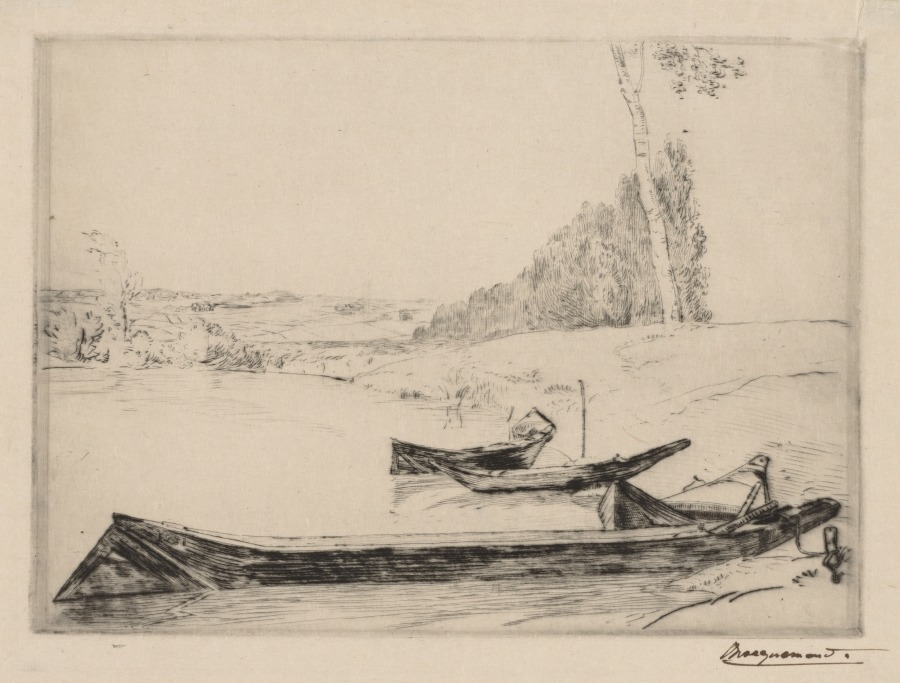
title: Small ferry-boats on the banks oft he Seine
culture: France, 19th century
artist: Félix Bracquemond (French, 1833–1914)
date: c. 1858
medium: drypoint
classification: Print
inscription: signed, lower right, in ink: Bracquemond